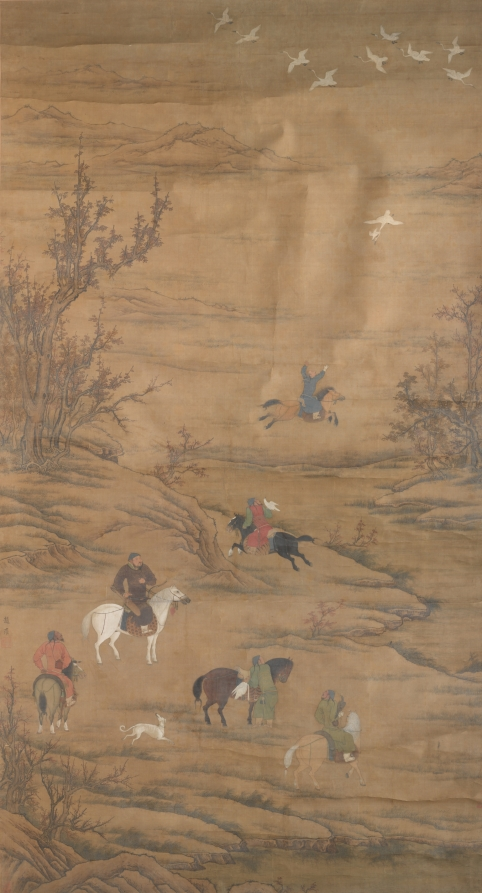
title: Hunting on Horses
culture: China, Ming dynasty (1368-1644) - Qing dynasty (1644-1911)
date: c. 1600s–1700s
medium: Hanging scroll; ink and color on silk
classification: Painting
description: This large-scale hanging scroll depicts a party hunting for waterfowl along a riverbank in the springtime. The leader is distinguished from the other five mounted hunters by his purple robe with golden dragon patterns and his white horse with a red tassel. He and his horse maintain still, dignified postures as a small white falcon captures one of the wild geese. Equestrian pursuits and hunting were particularly popular among the Khitan (also spelled “Qidan”) and Jurchen, ethnic groups who lived along China’s northeastern border. Their nomadic lifestyle intrigued the Chinese court and inspired Chinese artists to develop a painting genre showing them hunting.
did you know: This falconry scene includes one white hunting dog and four trained hunting birds.